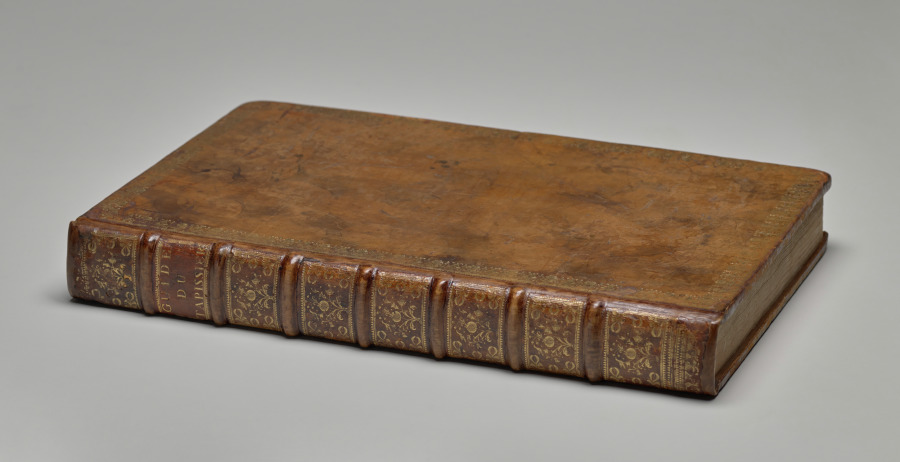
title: The Gentleman and Cabinet-Maker's Director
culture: Britain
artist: Thomas Chippendale (British, 1718–1779)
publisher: T. Becket & P. A. de Hondt (British)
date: 1762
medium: Paper, leather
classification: Bound Volume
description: Through his designs for furniture and architectural elements, Thomas Chippendale became one of the most influential tastemakers of the 1700s. He published three editions of The Gentleman and Cabinet-Maker’s Director (1754, 1755, and 1762), which sold widely in Britain, Ireland, and America. This rare French version of the third edition demonstrates his effort to spread his designs for both naturalistic and neoclassical decoration even wider across Europe.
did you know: Fewer than fifteen copies, including this one, of the French edition of Thomas Chippendale’s famous book of designs, are known to exist.